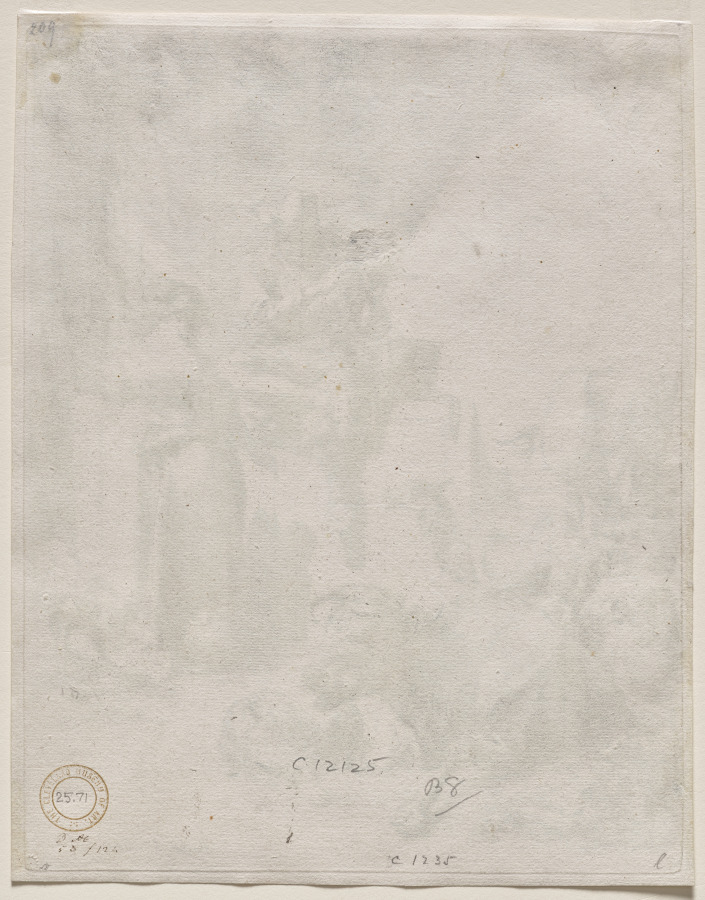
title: The Piping Shepherd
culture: Netherlands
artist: Nicolaes Berchem (Dutch, 1620–1683)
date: 1652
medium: etching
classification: Print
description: In this bucolic scene, a shepherd plays a tenor flute in hopes that his melody will seduce a shy shepherdess.